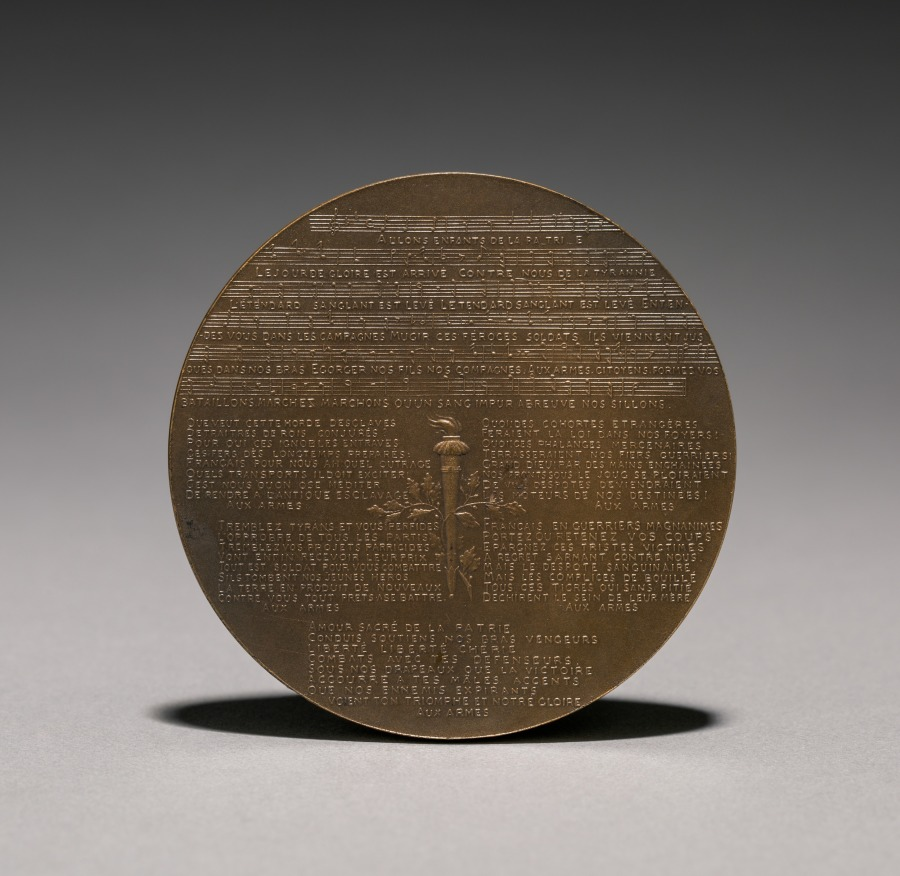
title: Medal of Claude Joseph Rouget de L'Isle (1760-1836) (reverse)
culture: France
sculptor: Alfred Borrel (French, 1836–1927)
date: 1911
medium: bronze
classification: Metalwork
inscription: Reverse: [score and all verses of "La Marseillaises"]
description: The French sculptor and medalist Alfred Borrel (1836-1927) created this portrait medal to commemorate the 75th anniversary of Rouget de L'Isle's death in 1836, the same year in which the sculptor was born.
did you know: Claude Joseph Rouget de L'Isle composed the French national anthem, La Marseillaises, in 1792 in Strasbourg after France had declared war on Austria.